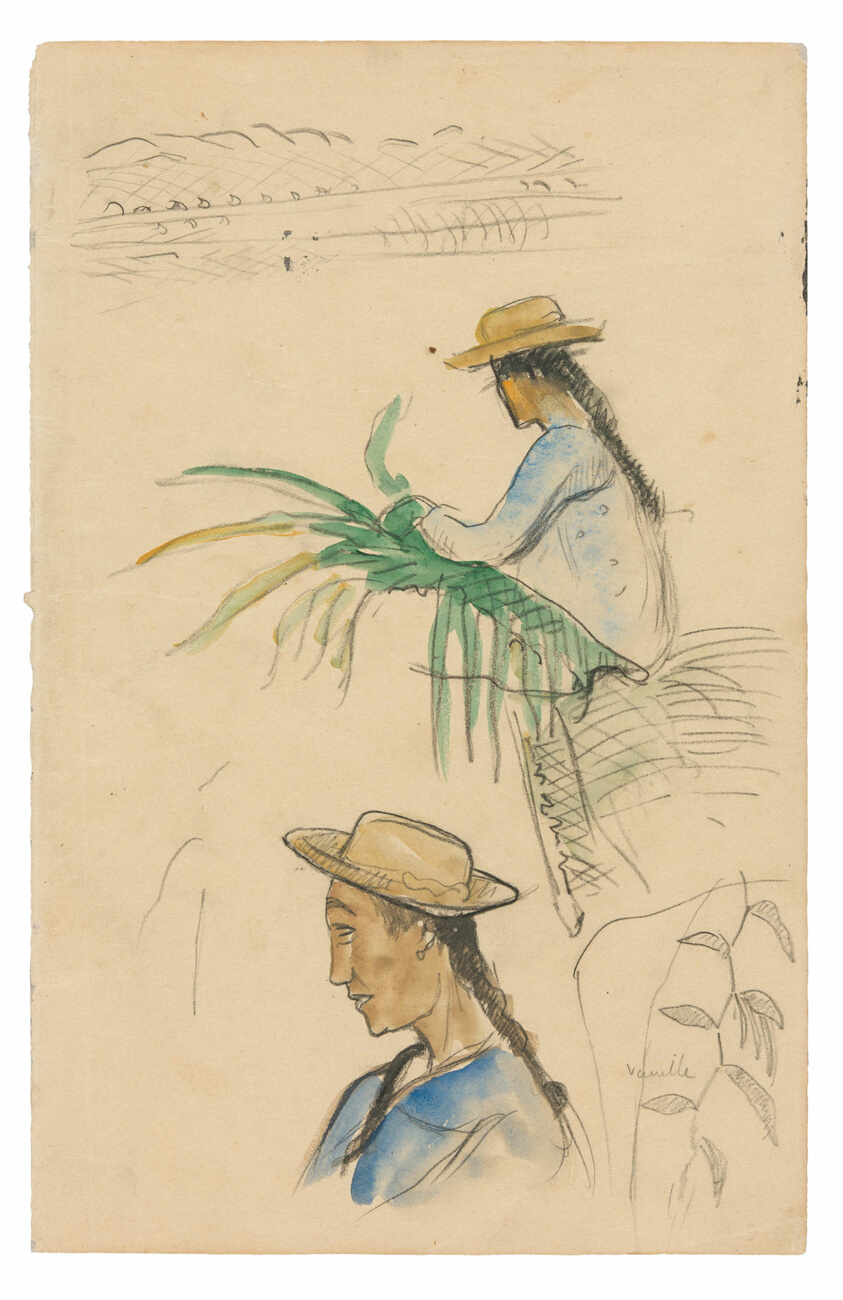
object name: Drawing and Watercolor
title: Sketches of Figures, Pandanus Leaf, and Vanilla Plant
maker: Paul Gauguin (French, 1848-1903)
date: 1891/93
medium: black fabricated chalk and watercolor on cream wove paper (removed from a sketchbook)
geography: France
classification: watercolor; drawings (visual works); prints and drawing